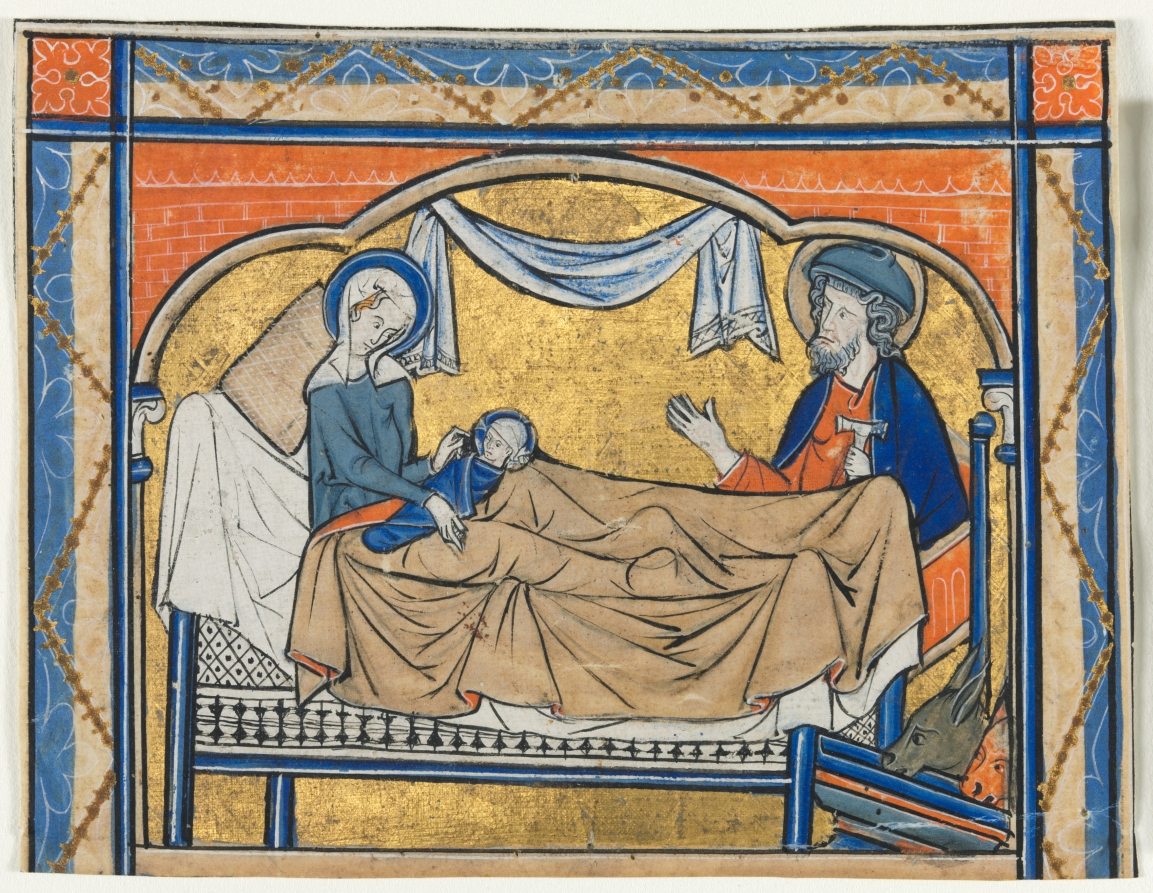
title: Miniature Excised from a Psalter: The Nativity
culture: England, London(?), 13th century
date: c. 1270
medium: ink, tempera, and gold on vellum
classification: Manuscript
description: This miniature survives with other fragments from a psalter preserved in the Metropolitan Museum of Art in New York City. It has been suggested that the manuscript may have been made for Queen Eleanor of Provence who became a nun of Amesbury in England following the death of her husband, King Henry III. The style and high quality of this miniature supports its association with a deluxe manuscript psalter made for a high-ranking patron.